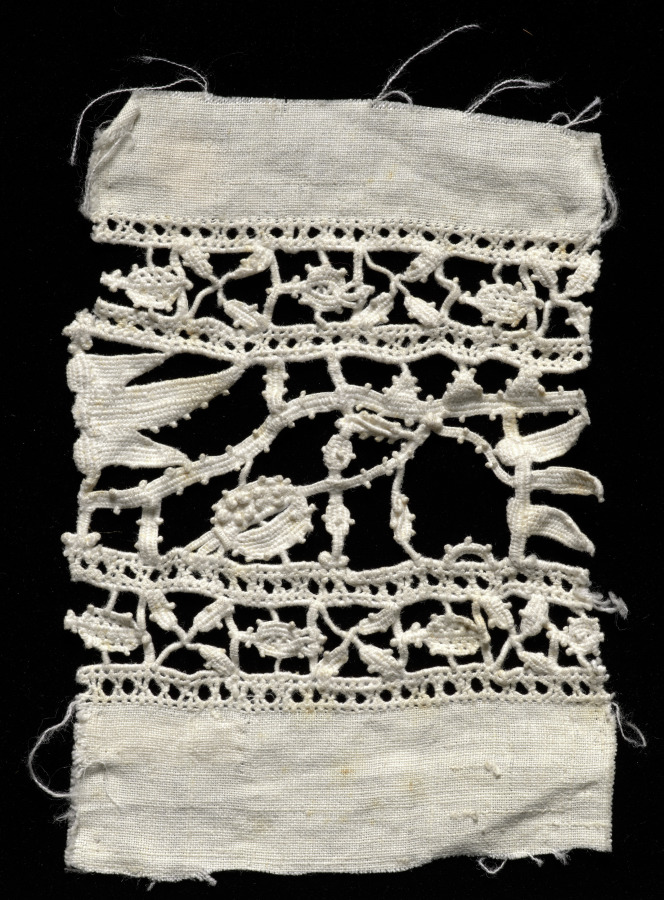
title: Lace Fragment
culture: Italy, Venice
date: 1600s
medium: Linen: needle lace (cutwork and reticella)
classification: Lace